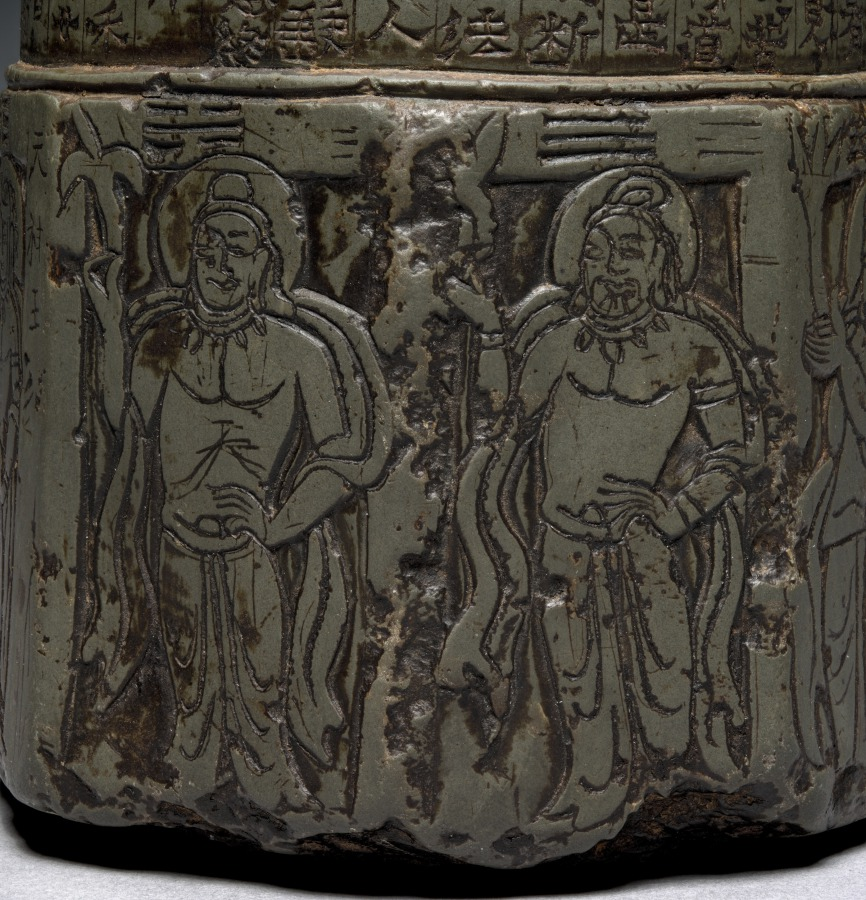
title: Miniature Votive Stupa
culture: China, Gansu province, Northern Wei dynasty (386-534)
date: 435 CE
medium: steatite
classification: Sculpture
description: This sutra pillar, inscribed with a sacred Buddhist text, belongs to a group of miniature stupas (jingta) that were found exclusively in the Gansu corridor, Northwest China. Ranging in date between AD 426–36, some of them bear the names of the lay Buddhist donors who commissioned them. A stupa is an architectural round structure built for the veneration of Buddhist relics. Miniature stupas may have commemorated the visit of a sacred site or represented donations to religious communities and sites.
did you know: There are trigrams, three horizontal lines, broken or continuous, above each of the eight bodhisattvas in the stupa's lower section.